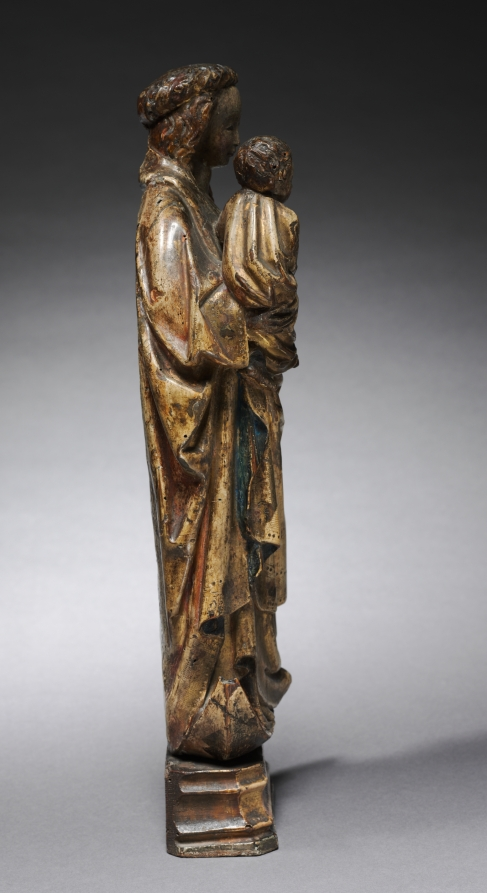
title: Virgin and Child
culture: South Netherlands, Malines, 16th century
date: c. 1510–1515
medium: painted and gilded walnut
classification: Sculpture